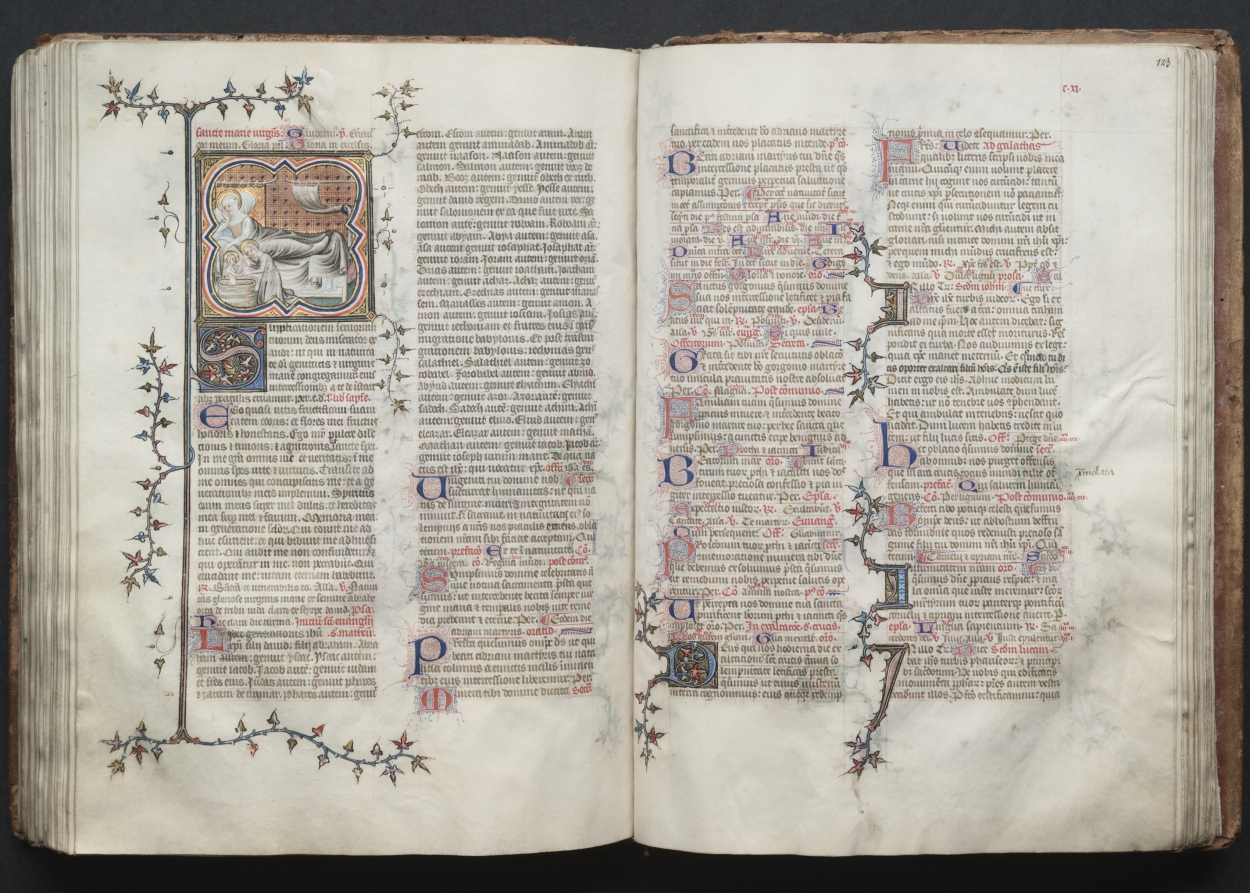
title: The Gotha Missal: Fol. 122v, The Birth of the Virgin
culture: France, Paris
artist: Master of the Boqueteaux (French)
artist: and Workshop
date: c. 1375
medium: ink, tempera, and gold on vellum; blind-tooled leather binding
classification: Bound Volume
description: The style and quality of this manuscript's decoration is typical of deluxe Parisian books made for aristocratic or royal patrons. Most of the book's decoration appears to be the work of the Master of the Boqueteaux, an artist active at the court of King Charles V (died 1380). His style was apparently shared by a number of book illuminators working in and around Paris. It is very possible that the Gotha Missal belonged to Charles V, but is not provable because the manuscript has no royal portraits and lacks a colophon. Given the book's magnificent decoration, however, it would seem that it was produced for a Valois prince, if not for the king himself. The manuscript receives its name from the German dukes of Gotha, its later owners.